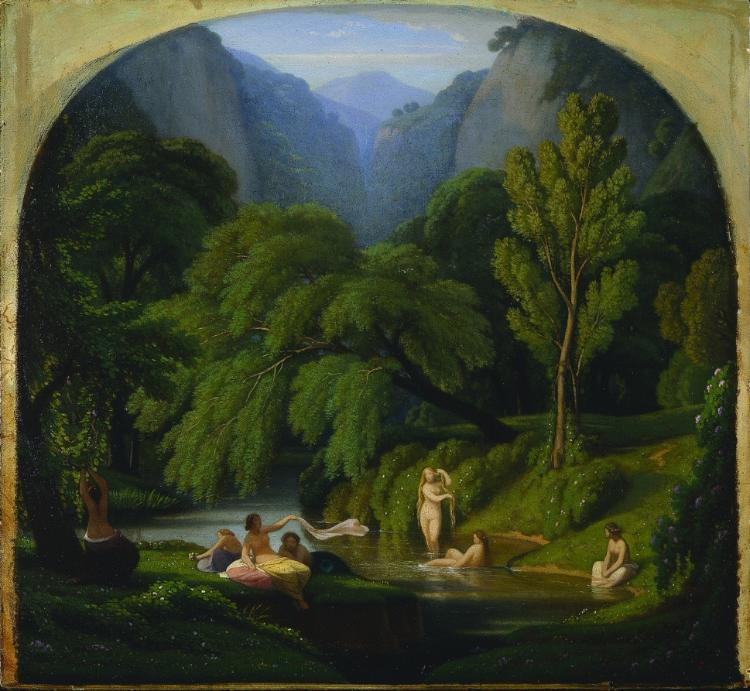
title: The Bathers, Souvenir of the Banks of the Anio River at Tivoli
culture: France, 19th century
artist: Théodore Caruelle d' Aligny (French, 1798–1871)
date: c. 1860/1861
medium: oil on wood panel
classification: Painting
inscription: Signed lower center: th. aligny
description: Although painted in France, this work depicts bathers near Tivoli, a popular, parklike estate near Rome, famous for its fountains, picturesque hills, and lush forests. As was the custom for many artists of the 19th century, d'Aligny traveled to Italy to study. He remained there from 1825 until 1827, making careful drawings and oil sketches directly from the Roman countryside. He would often use these works to compose more finished paintings in his studio. Although d'Aligny visited Italy twice more, his last trip was in 1843. This painting, made years after that date, is therefore a true souvenir, that is, a recollection evoking his experiences in Italy